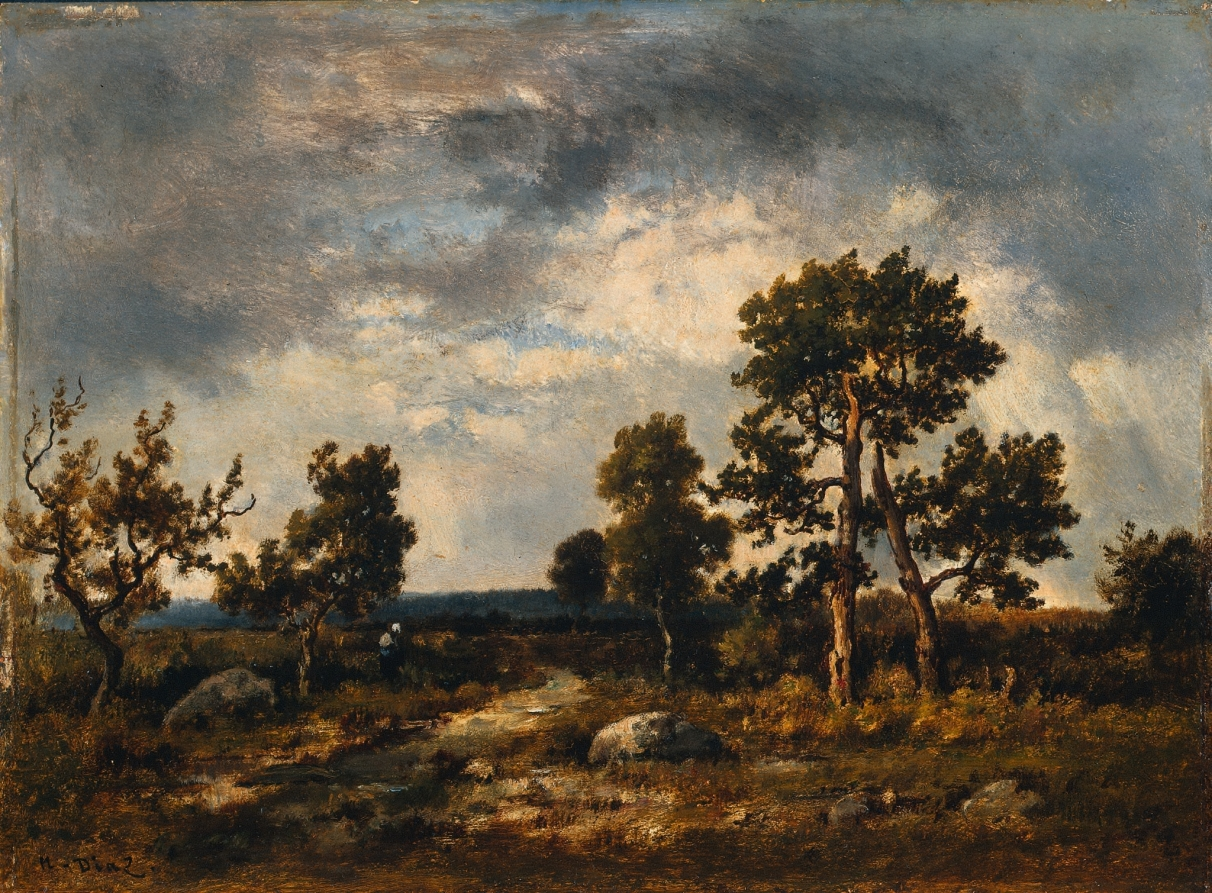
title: Path Near the Pond of Vipers, Fontainebleau Forest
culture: France, 19th century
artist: Narcisse Diaz de la Peña (French, 1807–1876)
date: c. 1860s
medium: oil on wood panel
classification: Painting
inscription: Signed lower left: N. Diaz